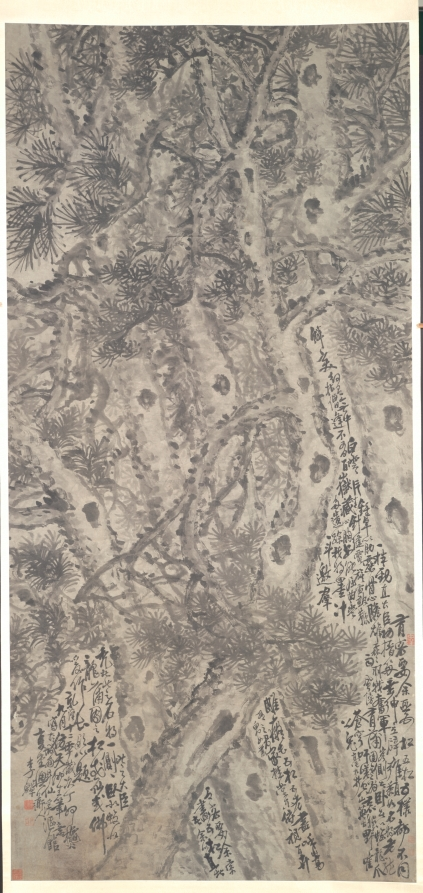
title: Five Pine Trees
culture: China, Qing dynasty (1644–1911), Qianlong reign (1736–95)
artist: Li Shan (Chinese, c. 1686–1762)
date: 1747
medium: Hanging scroll; ink on paper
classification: Painting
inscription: Artist's 5 poems (not translated), inscription, signature, and 4 seals: [seal] Chung-yang. A friend asked me to paint the five pines. I associated the straight pine with a statesman, the bald one with a famous general, the one leaning to one side and the one reclining with dragons, the short round one with foliage like a grass-mat with either an immortal or Buddha. And I composed a long poem as inscription. In autumn, the ninth month of the ting-mao year [1747], the twelfth year of the Ch'ien-lung era, I imitated the style of T'ien-ch'ih sheng [Hsü Wei, 1521-1593], at the Sheng-hsien fu-ou Studio in the southern part of the city. Fu-t'ang, Ao-tao jen, Li Shan. [2 seals] Shan-yin; Tsung-yang. [seal, lower left corner] Fu-t'ang, Li Shan. trans. LYSL/WKH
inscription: 2 additional seals of Cheng Qi 程琦 (1911–1988)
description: Li Shan was born into a family of scholars and officials in Yangzhou. The wealth and status of Li's family assured him an educational and cultural advantage, including his appointment at court. The subjects Li Shan chose to paint—orchids, bamboo, pines, and flowers—reflected his literati background. Five Pine Trees, painted late in his career, is an unconventional work. Rather than having focused on a realistic treatment of the subject, Li created the trees with an interplay of richly modulated strokes, while he utilized a semicursive script among the branches to illustrate the kinship between painting and calligraphy.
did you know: The writing among the branches illustrates the kinship between painting and calligraphy.